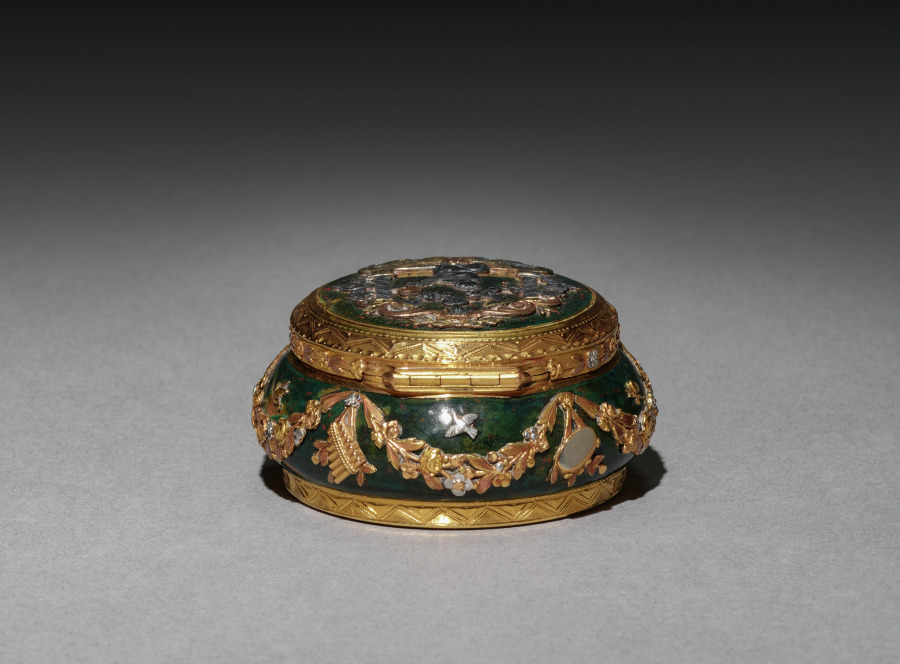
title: Bonbonniere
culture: France, 19th century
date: 1850–1899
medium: bloodstone (?) mounted in colored golds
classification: Miscellaneous